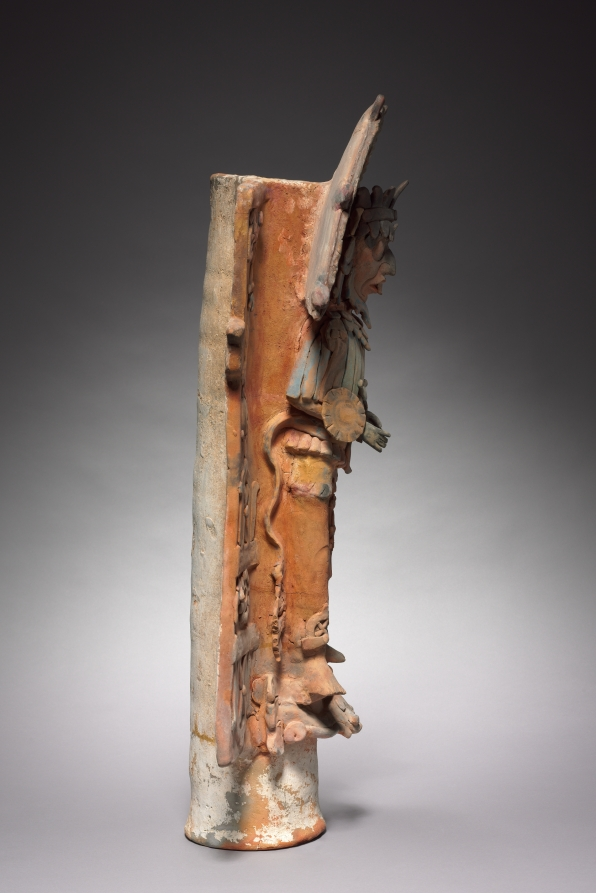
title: Incensario (Incense Burner) Support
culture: Mesoamerica, Maya, Palenque region, Classic Period (250-900) or modern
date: 600–900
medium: earthenware with pigments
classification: Sculpture